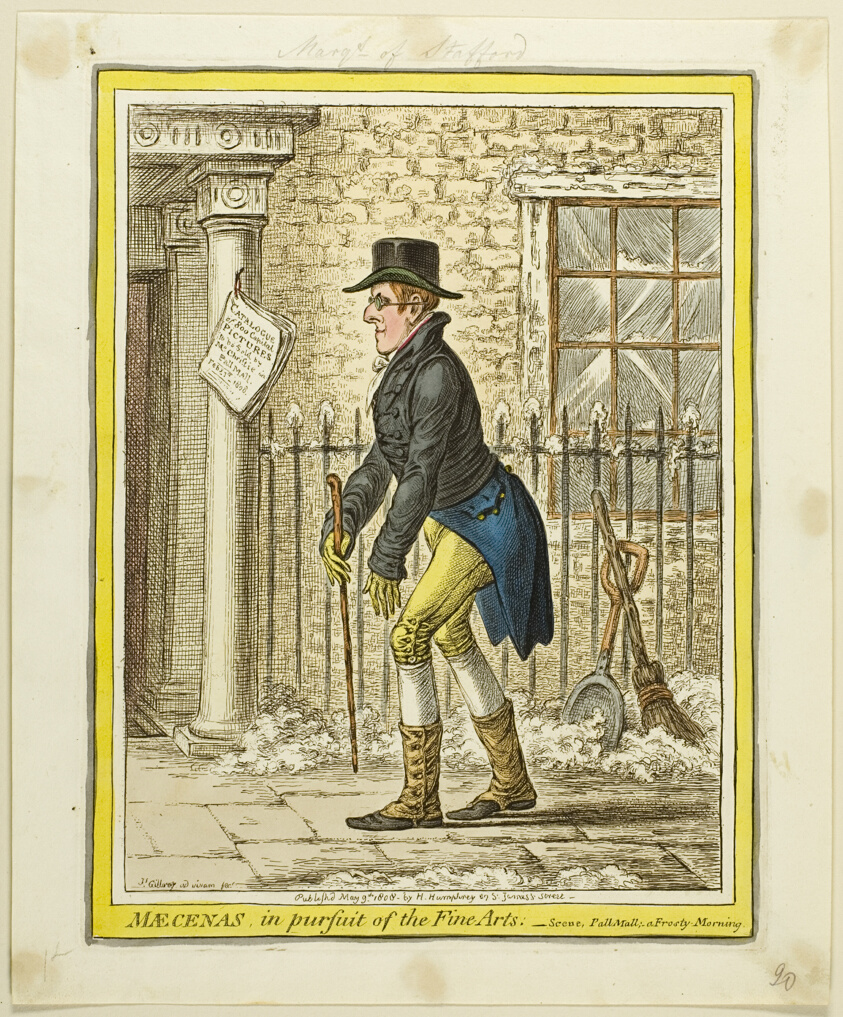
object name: Print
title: Maecenas, In Pursuit of the Fine Arts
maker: James Gillray (English, 1756-1815); published by Hannah Humphrey (English, c. 1745-1818)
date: published May 9, 1808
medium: Hand-colored etching on paper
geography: England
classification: etching; print; prints and drawing